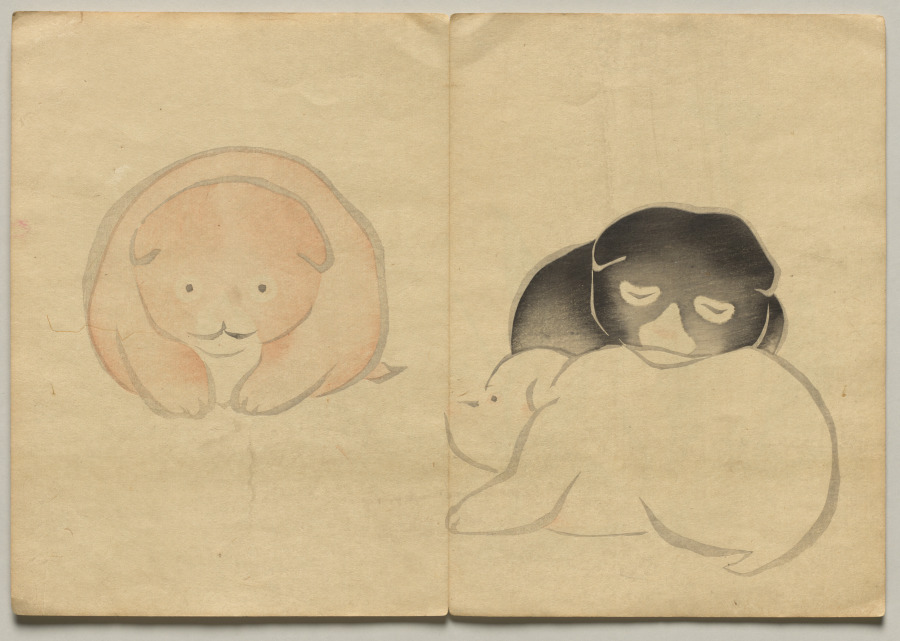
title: Scene from The Kōrin Picture Book (Volume 2)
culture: Japan, Edo period (1615–1868)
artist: Nakamura Hōchū (Japanese, d. 1819)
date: 1800s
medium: color woodblock printed book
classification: Bound Volume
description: Ogata Korin (1658-1716) was one of the most admired artists of Rimpa, or "decorative school painting." These books by the charming later-generation Rimpa artist Hochu record Korin's inventive designs.